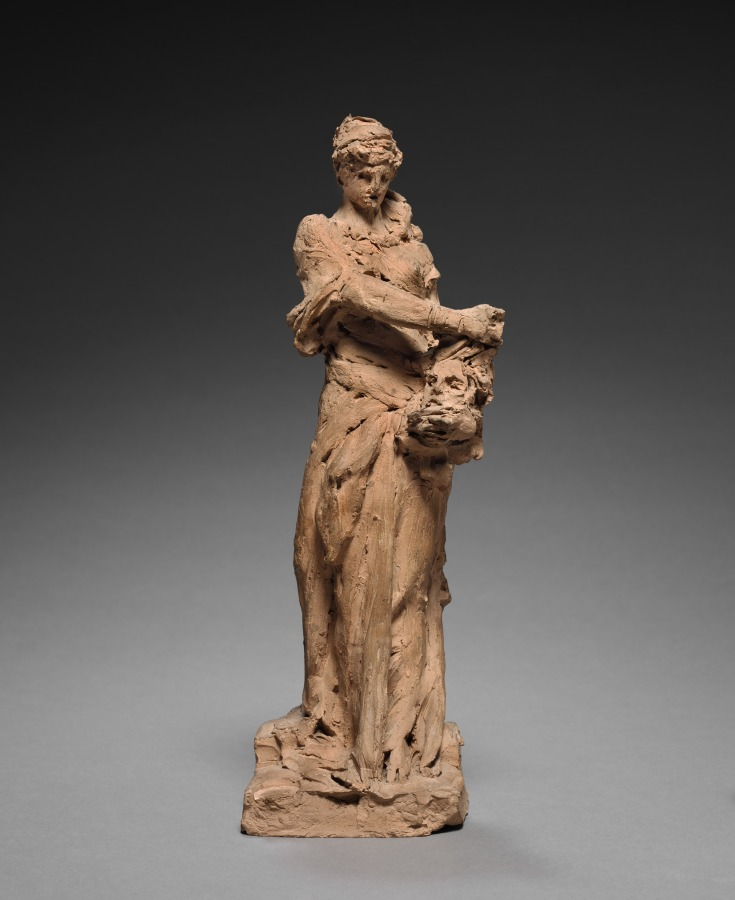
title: Judith with the Head of Holofernes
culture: France, 19th century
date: mid-1800s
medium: terracotta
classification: Sculpture